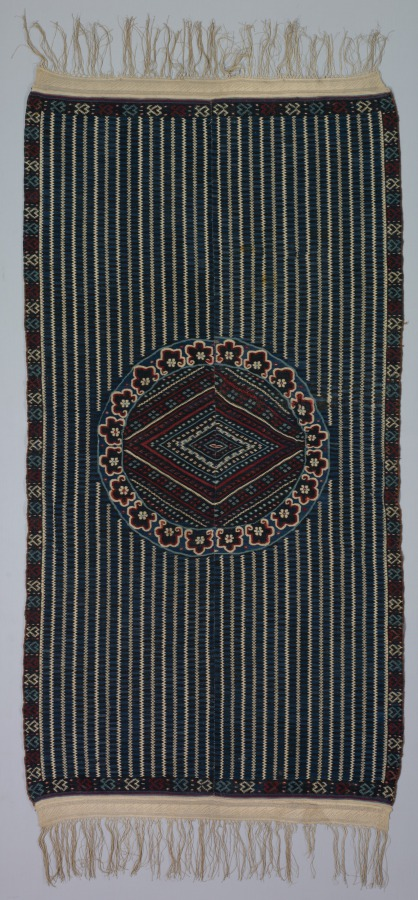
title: Saltillo Sarape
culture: Mexico, Coahuila state, Saltillo Region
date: c. 1840–60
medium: Wool, cotton; tapestry weave, macramé fringe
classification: Textile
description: The sarape (wearing blanket) is a classic Mexican men’s garment that became a symbol of national identity and pride after Mexico achieved independence from Spain in 1821. Examples woven between about 1750 and 1875 in Saltillo, a town in northern Mexico, are the sarape’s most famous representatives, prized for their design, color, and technical refinement.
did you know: Saltillo sarapes (wearing blankets) are prized for their design, color, and technical refinement.